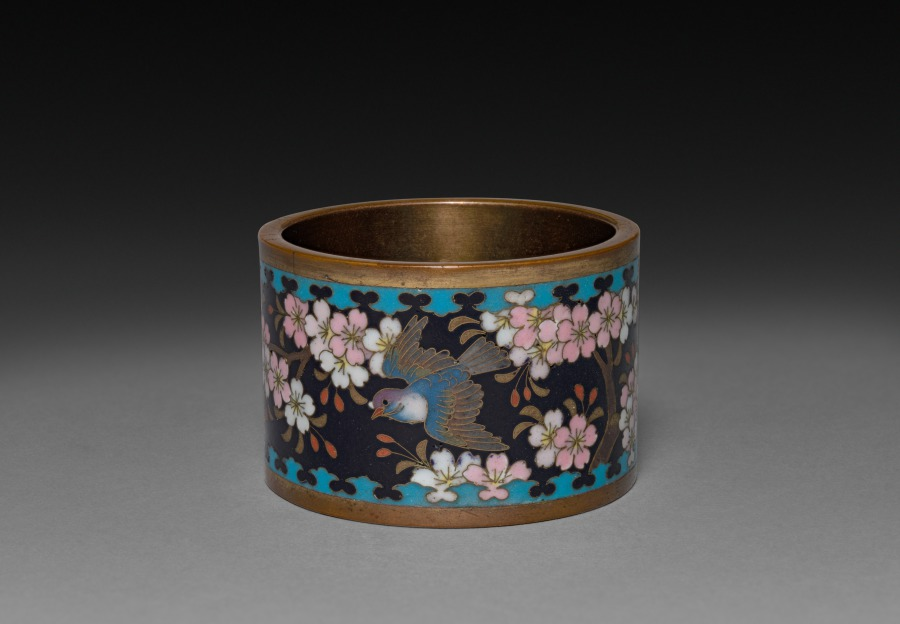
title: Napkin Ring with Cherry and Sparrow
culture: Japan, Meiji period (1868–1912) to Taishō period (1912–26)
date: early 1900s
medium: cloisonne enamel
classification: Enamel